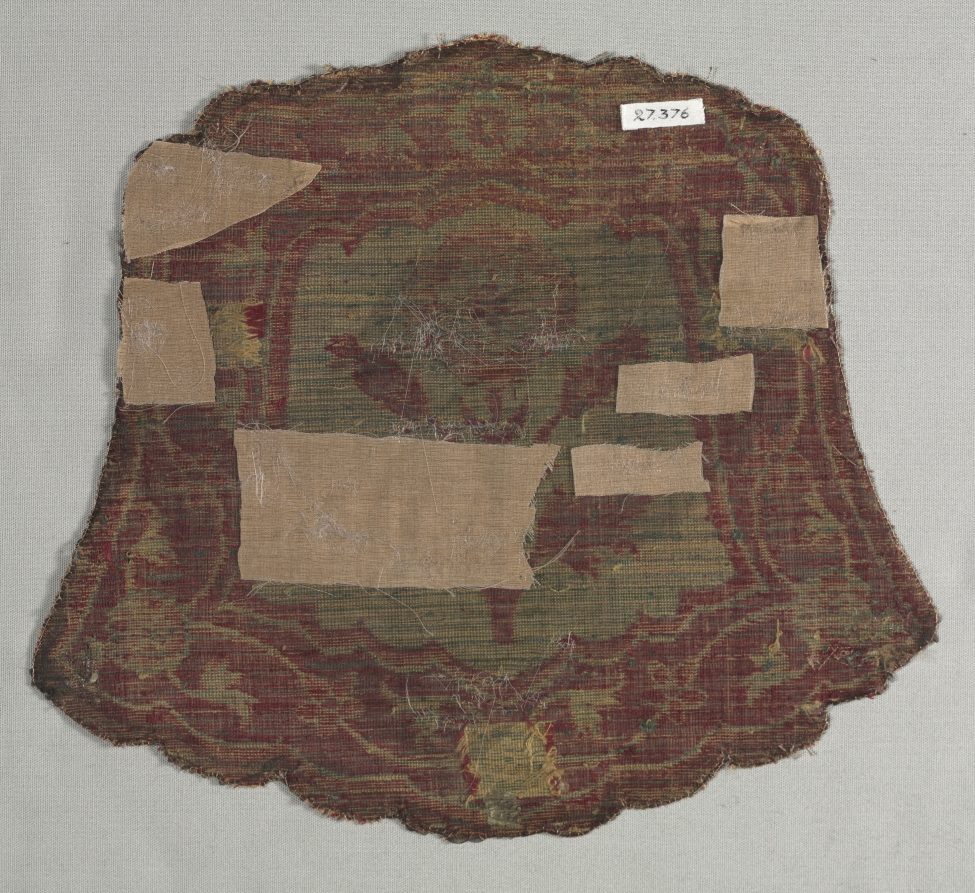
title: Shaped horse trapping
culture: India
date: 1600s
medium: velvet, brocaded and pile warp substitution: silk and gilt-metal thread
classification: Velvet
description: The scrolling floral vines in the border and the combination of gold with imperial crimson resonate with the painted depiction of the textiles that accompany portraits of the emperor. The poppy plant in the center can be identified by the leaves with multiple lacy points and may reference the opium in which Emperor Jahangir indulged daily.